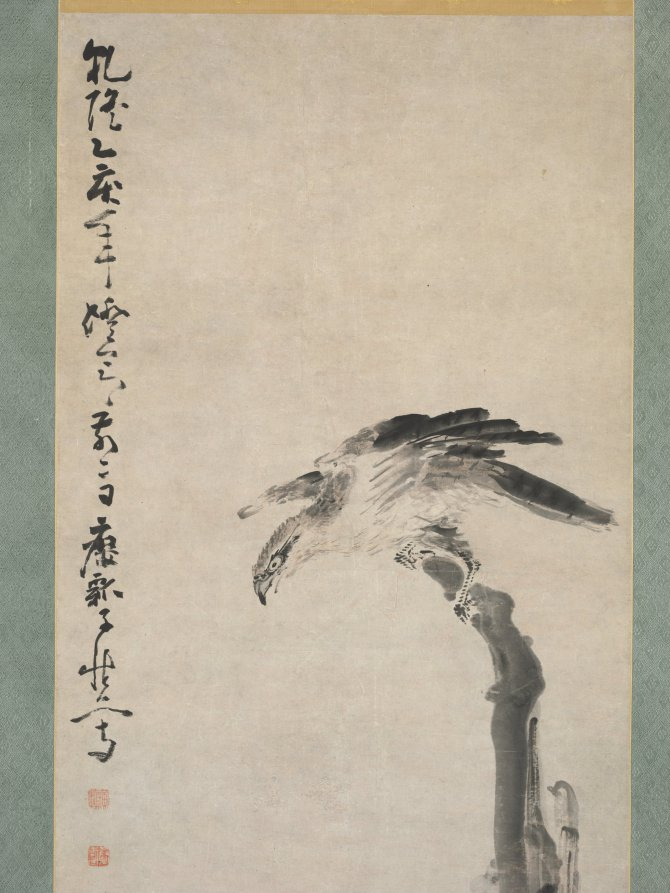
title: Eagle on a Tree Trunk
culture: China, Qing dynasty (1644–1911), Qianlong reign (1736–95)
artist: Huang Shen (Chinese, 1687–after 1768)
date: 1755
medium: Hanging scroll; ink and color on paper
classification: Painting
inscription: 乾隆乙亥年燈節前二日癭瓢子慎写。 [印]黃慎; 恭壽。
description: Huang Shen’s swift painting style is paralleled in his calligraphy. The vertical line in running script echoes the fluid form of the eagle on a tree trunk covered with a twisted vine. A native of Fujian province, Huang came to Yangzhou in 1724 to make his living as a painter. He needed years to develop a style that met the taste of his clients. He eventually became known as a figure painter and as one of the Eccentrics from Yangzhou, a group of local artists known for their unorthodox painting style.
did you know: With its wings partially lifted and sharp beak open in expectation, the eagle seems intent on some unseen prey below.